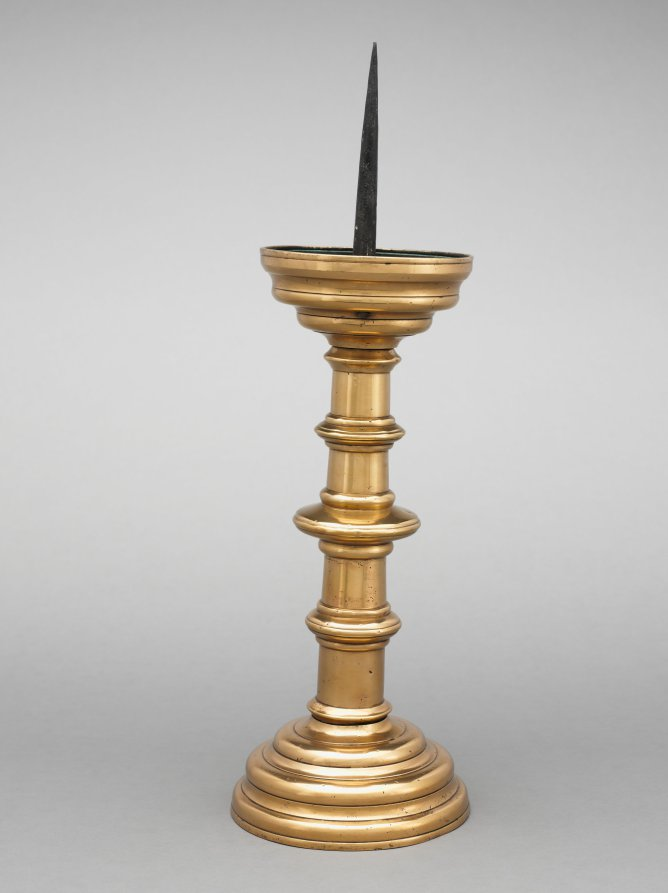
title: Pricket Candlestick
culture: South Netherlands, Valley of the Meuse, 16th century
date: early 1500s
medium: brass (hollow cast in three parts) and iron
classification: Metalwork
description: This object is an example of a type of metalwork known as "dinanderie," produced in and around the town of Dinant on the River Meuse in the Belgian province of Namur. Late medieval Dinant specialized in the production of these finely cast and finished objects in brass alloy, supplying aquamanilia, candlesticks, patens, basins, baptismal fonts, and other altar furniture throughout the Meuse Valley and for export beyond.